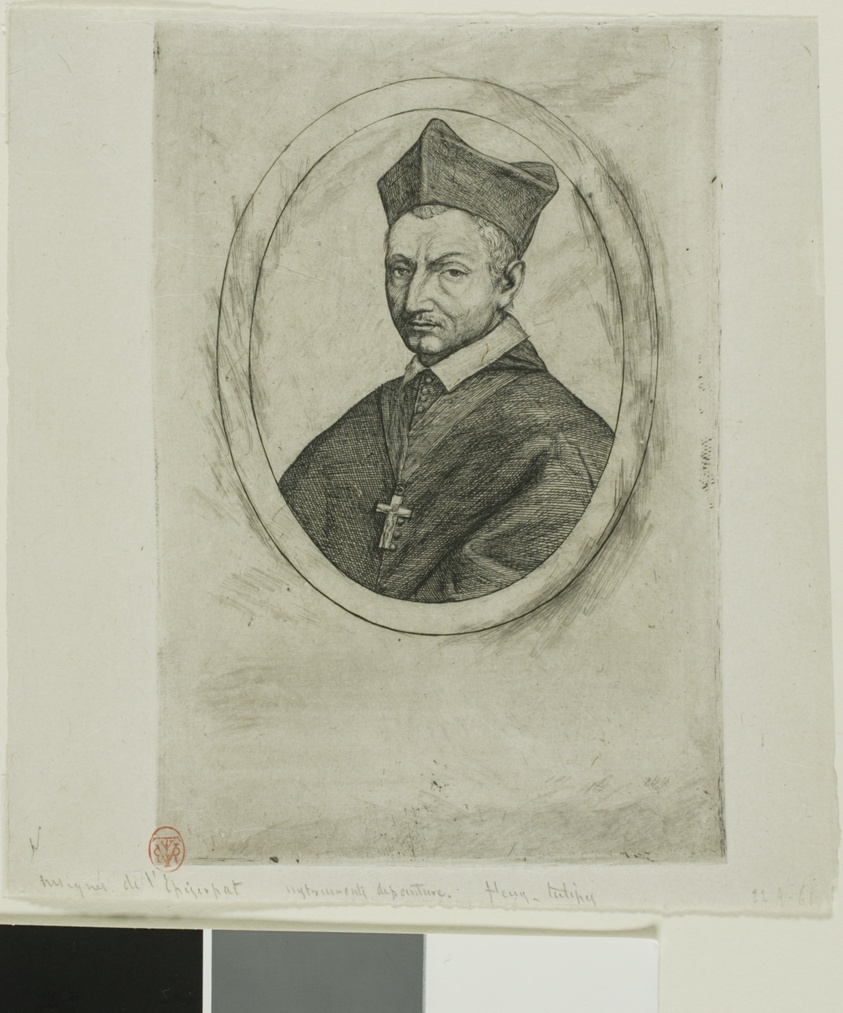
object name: Print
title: Portrait of Pierre Nivelle, Bishop of Luçon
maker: Charles Meryon (French, 1821-1868); after Michel Lasne (French, c.1590-1667)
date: 1861–62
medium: Etching, from a tin plate, with burnishing and foul-biting on grayish ivory laid paper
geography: France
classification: etching; print; prints and drawing